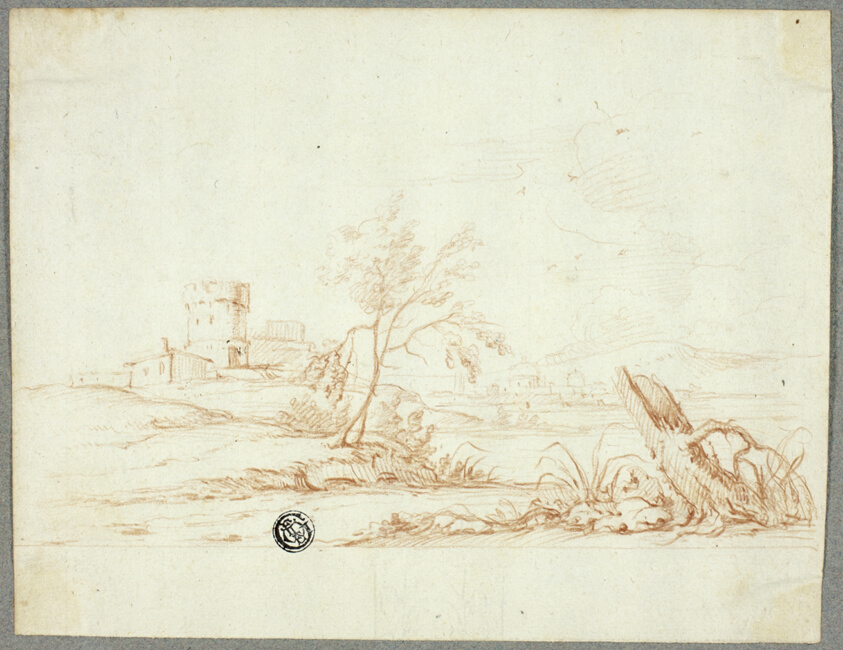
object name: Drawing and Watercolor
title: Tower and other Buildings in Landscape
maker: Styile of Jean Baptiste Pillement; French, 1719/28-1808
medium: Red chalk, on ivory laid paper, tipped onto blue laid paper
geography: France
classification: chalk; drawings (visual works); prints and drawing